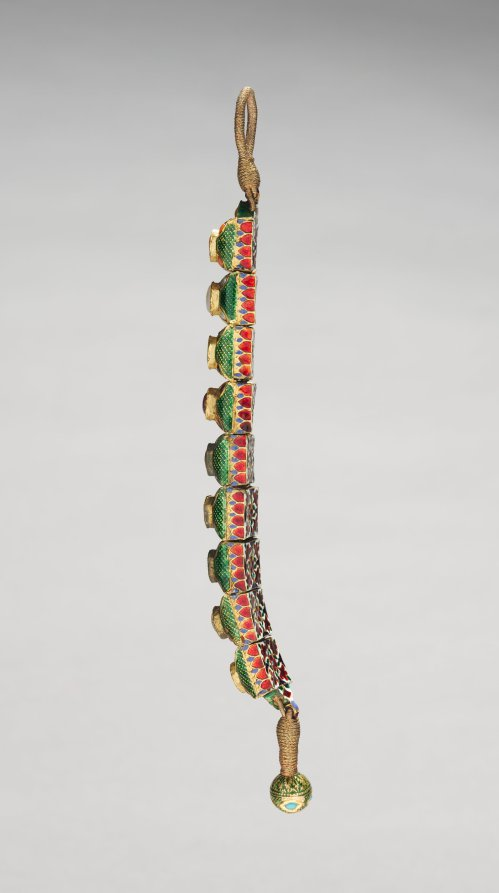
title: Armlet of bazuband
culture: India, Punjab, 18th-19th Century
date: 1700s-1800s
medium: gold, encrusted enamel and gems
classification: Jewelry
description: The gems symbolize the nine planets believed to control human destiny.